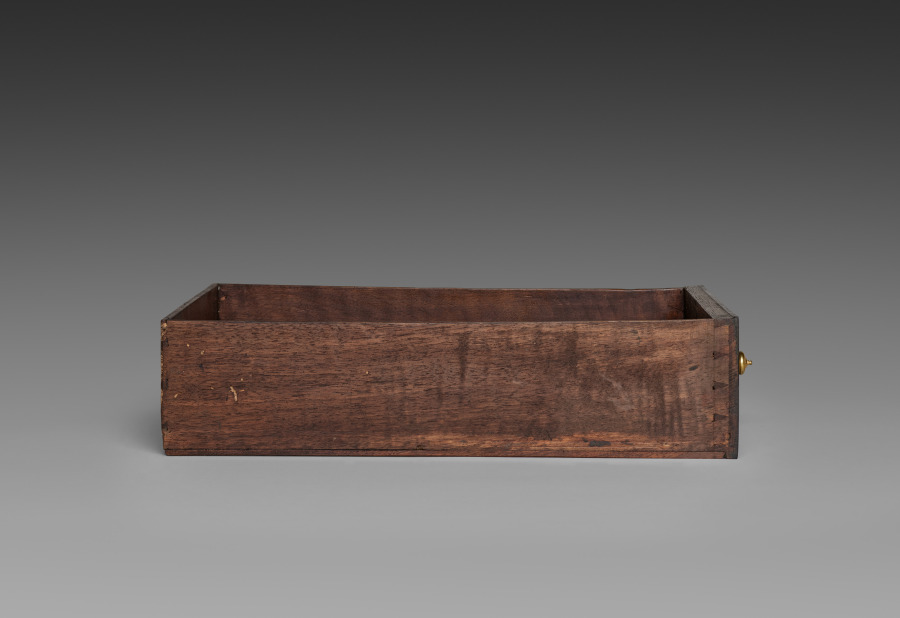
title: Interior Drawer for Cabinet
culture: France, late 17th Century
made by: André-Charles Boulle (French, 1642–1732)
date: c. 1690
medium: ebony, marquetry in metal and tortoiseshell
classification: Furniture and woodwork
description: Appointed cabinetmaker to King Louis XIV in 1672, André-Charles Boulle became a master of furniture making in France during the late 1600s until his death in 1732. Known primarily for his use of marquetry, in which metal patterns are inlaid into tortoiseshell then applied within the veneered surface of the furniture, Boulle established a level of quality and craftsmanship few others could achieve. As a result, his work found favor at the royal court and among other aristocrats and diplomats eager to impress the king. The inclusion of a medallion depicting Louis XIV within the bronze decoration of this chest would have identified the owner with the royal court. Often exhibiting stout architectural proportions with elegant groups of inlaid motifs such as the parrot on the central panel of this chest, Boulle’s designs are an example of the intellectual fashion for contrasting ideas, materials, and motifs.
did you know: Originally designed to sit atop an elaborate tall stand, this chest was likely altered in the late 1700s to reduce its scale and height.